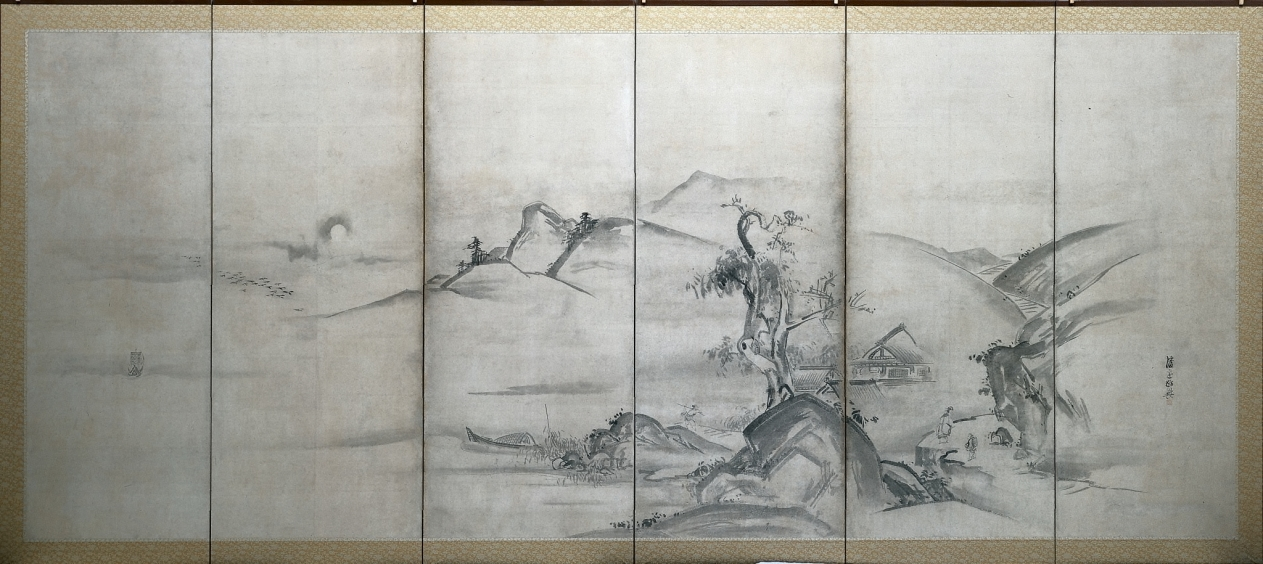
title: Eight Views of the Xiao and Xiang Rivers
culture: Japan, Edo period (1615–1868)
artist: Watanabe Shikō (Japanese, 1683–1755)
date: 1700s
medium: Six-panel folding screen, ink on paper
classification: Painting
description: Watanabe Shiko, an Edo period painter who combined Kano school style with Rimpa style, re-created the Xiao and the Xiang rivers on a pair of eight-panel screens. For this composition, he followed the Kano school’s sense of space, adapted from miniature copying paintings (shukuzu) by the Japanese artist Kano Tanyu. Watanabe revised the typical representations of the Xiao and the Xiang rivers by rendering the theme Wild Geese Descending to Sandbar on the right screen and Evening Bell from Mist-Shrouded Temple on the left screen. He depicted simple motifs—moon, boat, geese, and temple—to suggest the other scenes while also creating airy space.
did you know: This screen forms a pair with CMA 1960.284.